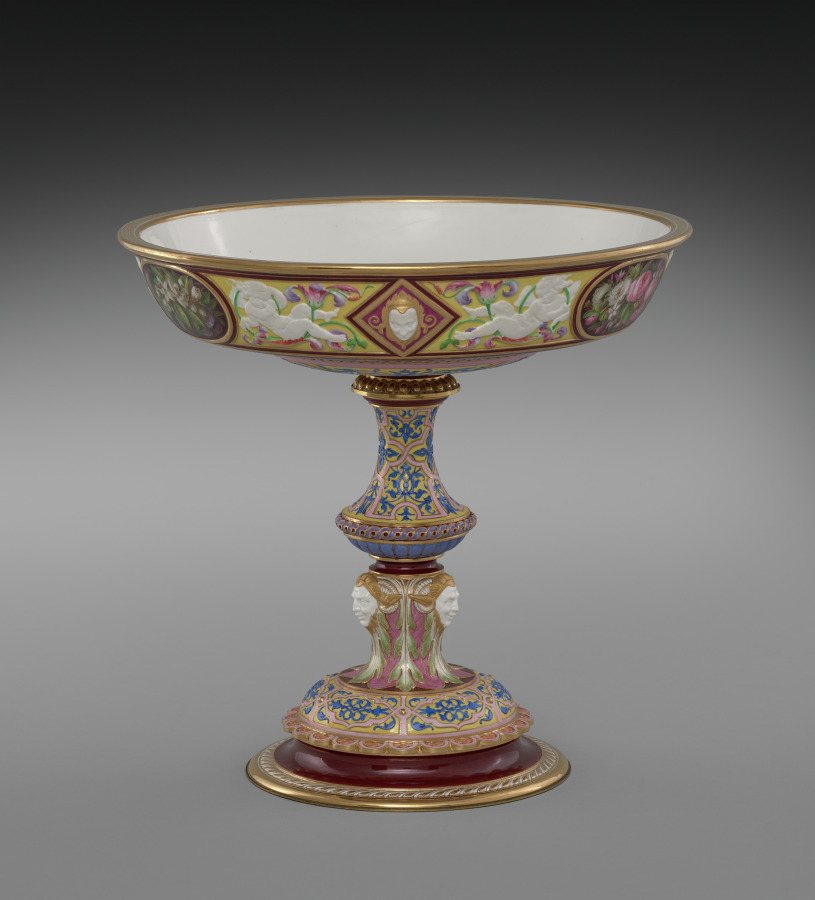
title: Standing Cup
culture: France, Sèvres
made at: Sèvres Porcelain Factory (French, est. 1756)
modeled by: Hyacinthe-Jean Regnier (French, 1803–1870)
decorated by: Francois-Hubert Barbin (French, 1786-)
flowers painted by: Jacques-Nicolas Sinsson (French)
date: 1844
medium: porcelain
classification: Ceramic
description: The official French porcelain factory at Sèvres has always been one of Europe's most important ceramic manufacturers, famous for its decorative pieces as well as more utilitarian wares. This vase in the Renaissance style, its design inspired by 16th-century French examples, is clearly in the tradition of elaborately conceived and decorated pieces intended for use by the French court or as presentation pieces by its monarchs. The latter was the fate of this Covered Cup, acquired in 1846 by Queen Marie-Amélie d'Orleans, the wife of Louis-Philippe, king during the July Monarchy (1830-48). Soon thereafter the vase was presented to a now unknown person. It is one of four pieces of this design made at the Sèvres factory, and the only one known today to have survived.